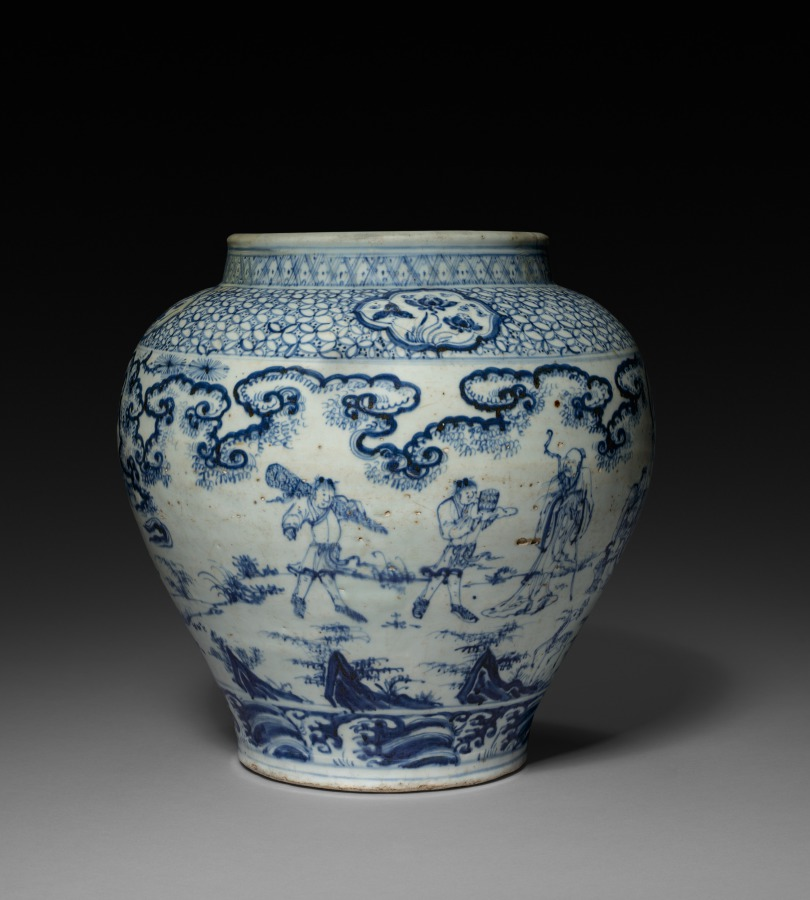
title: Jar with Scenes from the Land of Daoist Immortals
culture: China, Ming dynasty (1368–1644)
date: early 1400s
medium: porcelain with underglaze blue decoration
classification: Ceramic